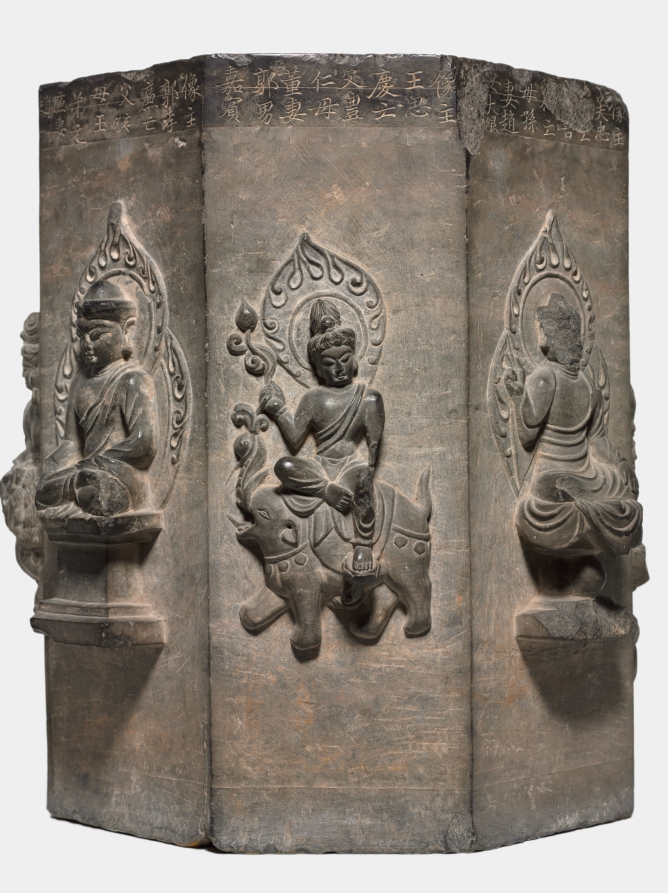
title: Section of a Dharani Pillar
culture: China, Tang dynasty (618-907)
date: 618–907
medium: limestone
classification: Sculpture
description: This octagonal stone pillar, with Buddhist figures carved on its eight sides, is part of a dharani pillar commissioned by Buddhist believers to pay tribute to the dead. The eight inscriptions seen here are eulogies dedicated by eight families to their deceased family members. Dharanis were a form of spell in Esoteric Buddhism said to possess supernatural power when being recited or carried and were incorporated into sutras, such as the Buddha Usnisa Vijaya Dharani Sutra. Dharani pillars, also called sutra pillars, became the dominant bearers of Usnisa Vijaya Dharani which supposedly helped sentient beings prolong life and destroy hardships of the eternal cycle of life and the realms of hell.